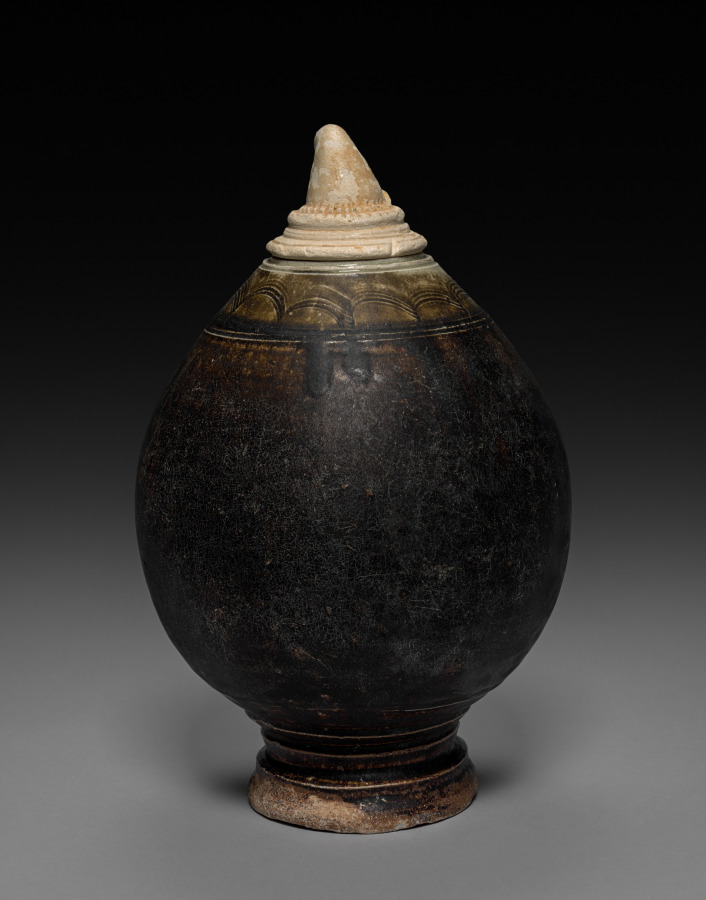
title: Jar in the Shape of a Fruit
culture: Cambodia, Northeast Thai kiln, Khmer Ware, Angkor Wat/Bayon period, 12th century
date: 1100s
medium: glazed pottery with brown slip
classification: Ceramic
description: This dark-brown glazed jar, with the heavy clay body and translucent glaze on the cover and the top just below it, has a rare shape of a fruit. It has a narrow foot with several moldings and incised wavy pattern immediately below the cover which is shaped in the form of a curling fruit stem that forms a handle. It is difficult to determine what type of fruit was meant, possibly a squash.